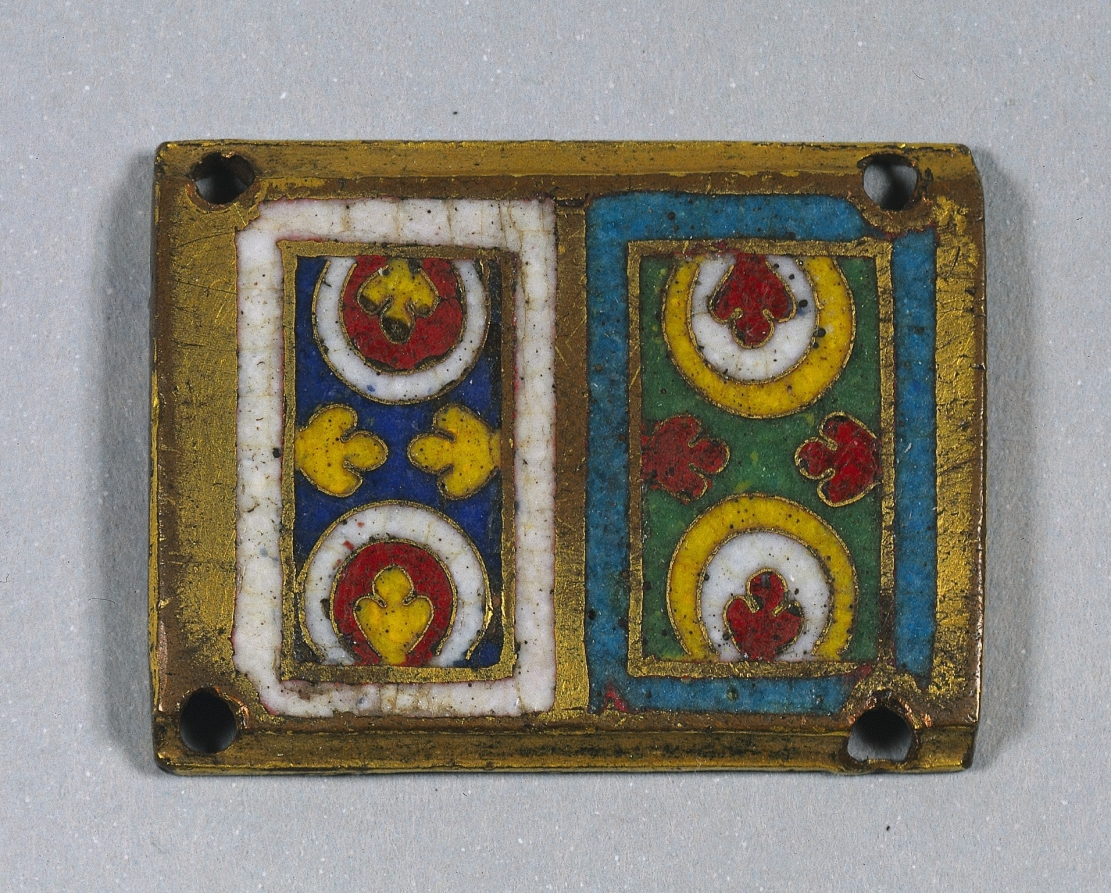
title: Plaque from a Reliquary Shrine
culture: Germany, Rhine Valley, Cologne, Romanesque period, 12th century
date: c. 1170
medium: gilded copper; champlevé and cloisonné enamel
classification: Enamel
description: These decorative enamel plaques (1953.274, 1953.638, 1957.502, and 1961.27) have been linked to some of Cologne's most important reliquary shrines, namely the shrine of the Three Kings at Cologne Cathedral and the shrines of Saints Maurinus and Albinus in the Benedictine abbey church of Saint Panteleon.